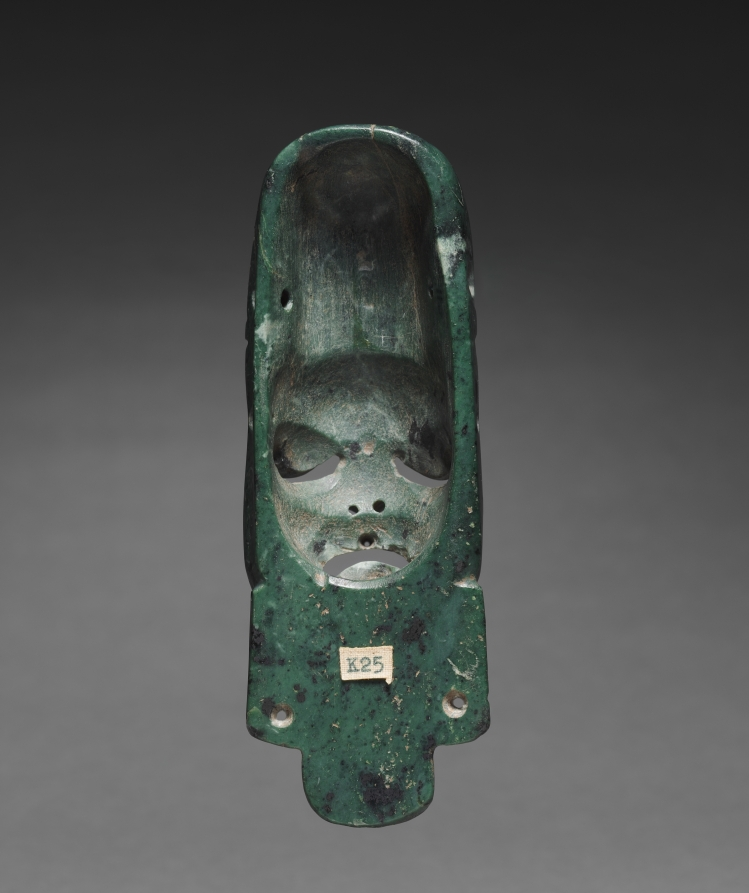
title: Elongated Mask Ornament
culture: Mesoamerica, Mexico, Olmec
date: c. 900–300 BCE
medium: greenstone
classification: Sculpture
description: Small masks made of precious media-especially greenstone, which Mesoamerican people valued above most other materials-likely served as elements of Olmec elite regalia. Such masks commonly depict human faces, although it is unclear whether the creature shown on this unusual example is human or supernatural. It may be a late work.